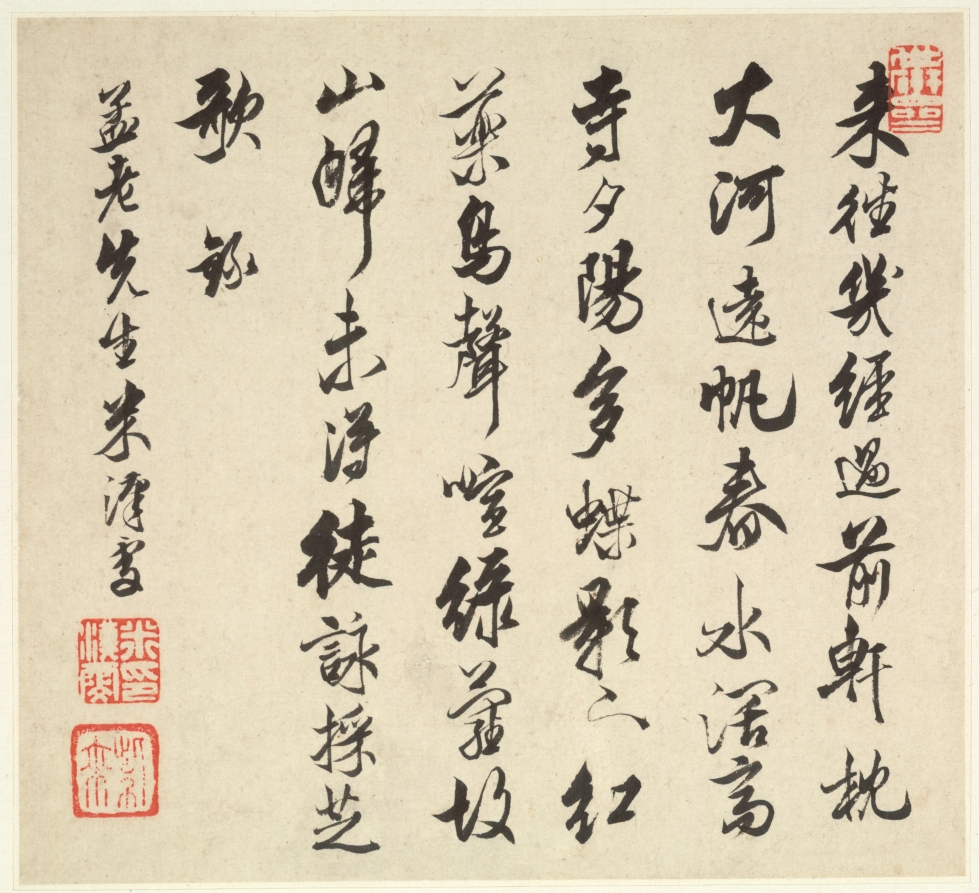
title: Album of Landscapes: Leaf 4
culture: China, Qing dynasty (1644-1911)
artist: Wang Gai (Chinese, active c. 1677–1705)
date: 1677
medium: album leaf, ink and light color on paper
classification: Painting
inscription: Poem by Mi Han-wen